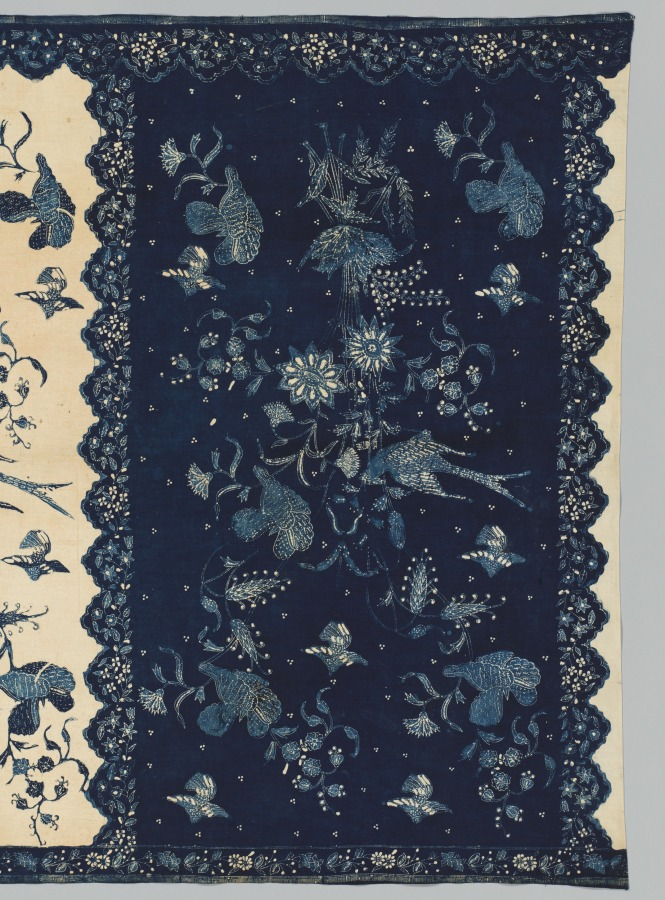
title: Sarong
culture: Indonesia, Java, North Coast, Indramaju ?, early 20th century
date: early 1900s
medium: batik; cotton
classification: Textile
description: Batiks made along the northern coast of Java were influenced not only by Chinese motifs and designs but also European, as a result of the Dutch presence in Indonesia from the sixteenth to the twentieth centuries. In this sarong, European influence is clearly evident in the sprays of flowers and types of birds represented. Batiks dyed only in indigo were a specialty of Indramaju. Shading and contrast are skillfully achieved through different intensities of blue, through the character and thickness of line, and by the use of tiny dots.